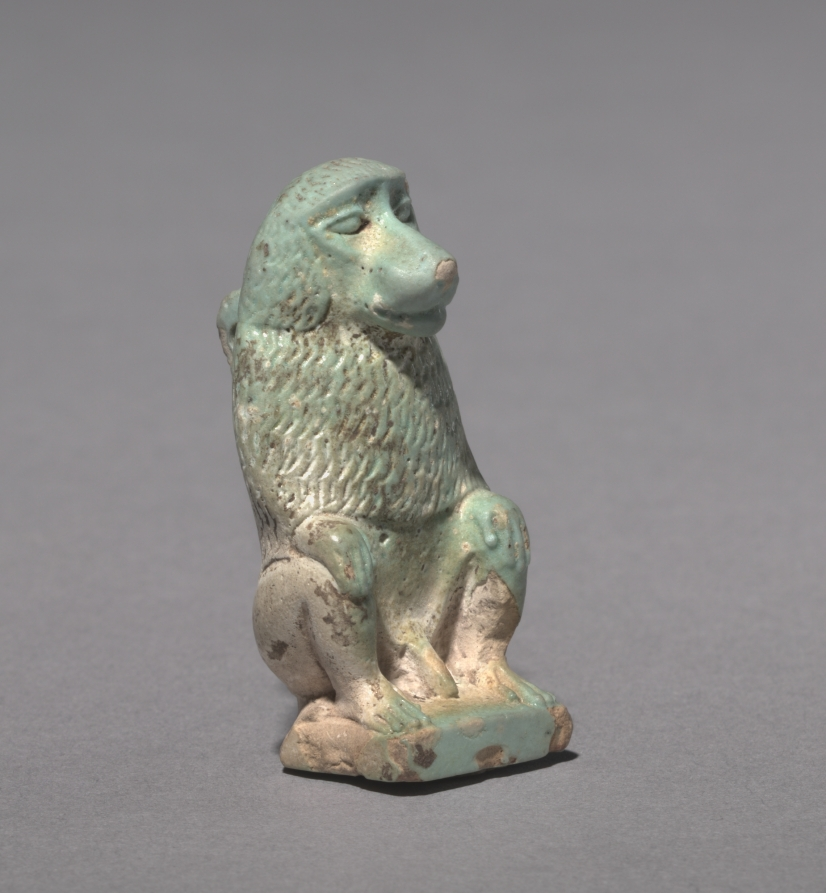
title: Thoth as Baboon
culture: Egypt, Late period (715–332 BCE), Dynasty 26–Greco-Roman period (332 BCE–395 CE), Ptolemaic dynasty (305–30 BCE)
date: 664–305 BCE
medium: pale turquoise faience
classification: Amulets